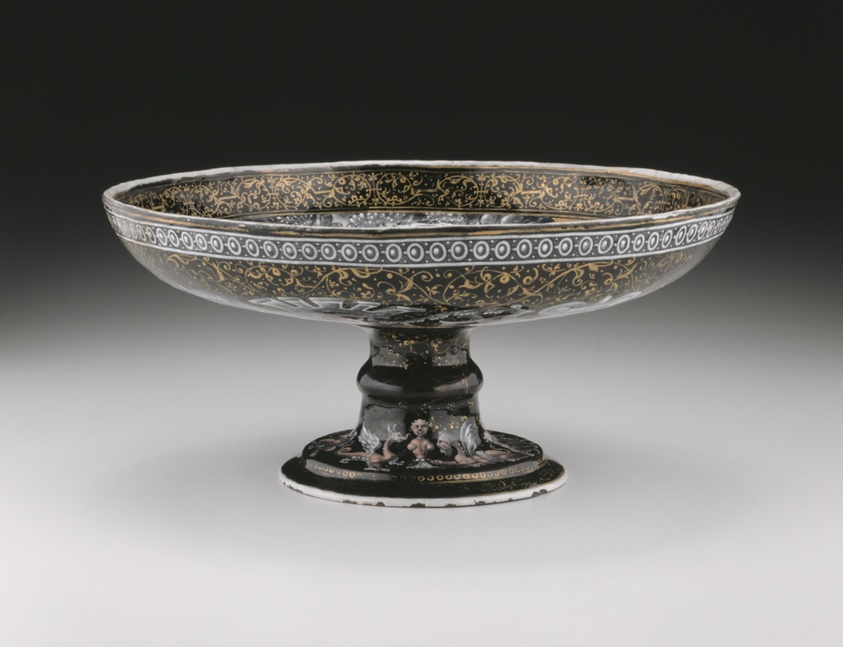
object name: Metalwork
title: Tazza with Moses Striking Water from the Rock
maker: Master I. C. (French, active 1553-85)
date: 1570/75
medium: Painted enamel on copper with gilding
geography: Limoges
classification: copper; metalwork; european decorative arts; decorative arts